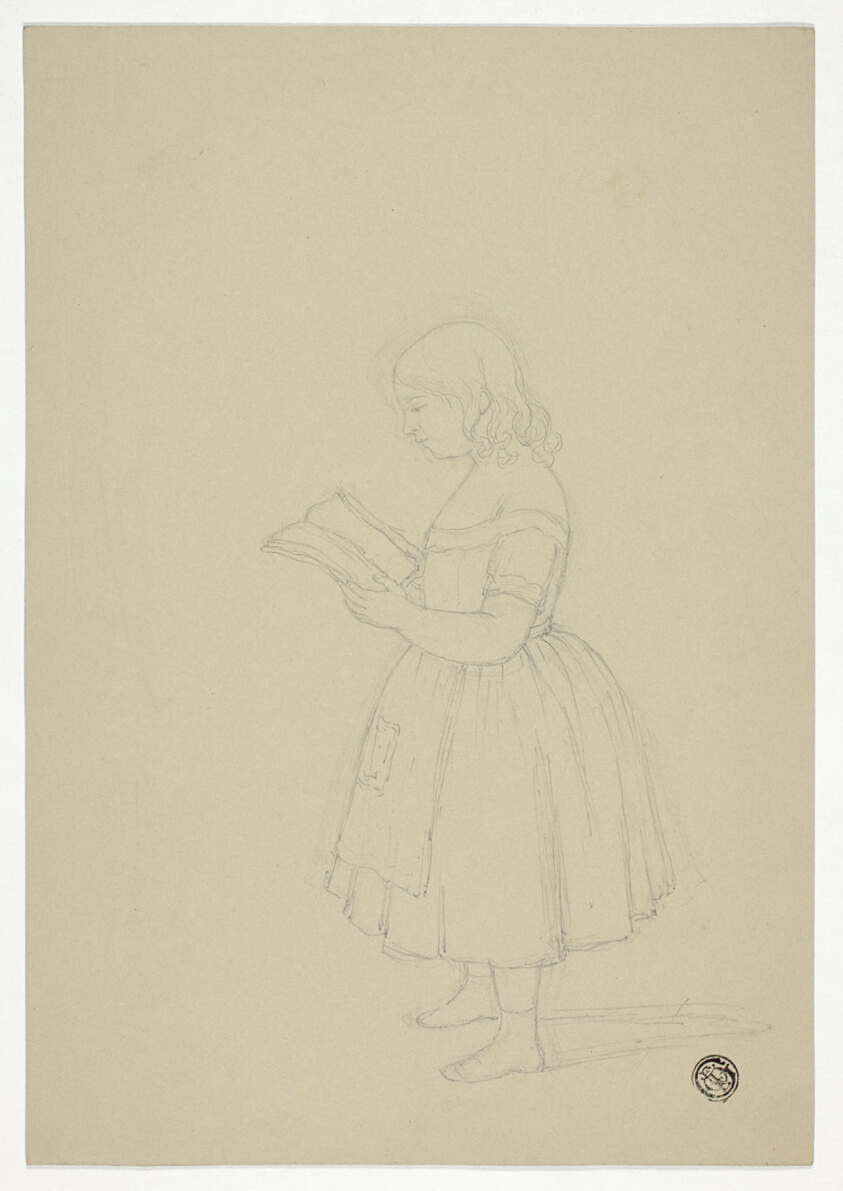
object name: Drawing and Watercolor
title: Young Girl Reading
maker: Elizabeth Murray (English, c. 1815-1882)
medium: Graphite on gray wove paper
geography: England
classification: graphite; drawings (visual works); prints and drawing